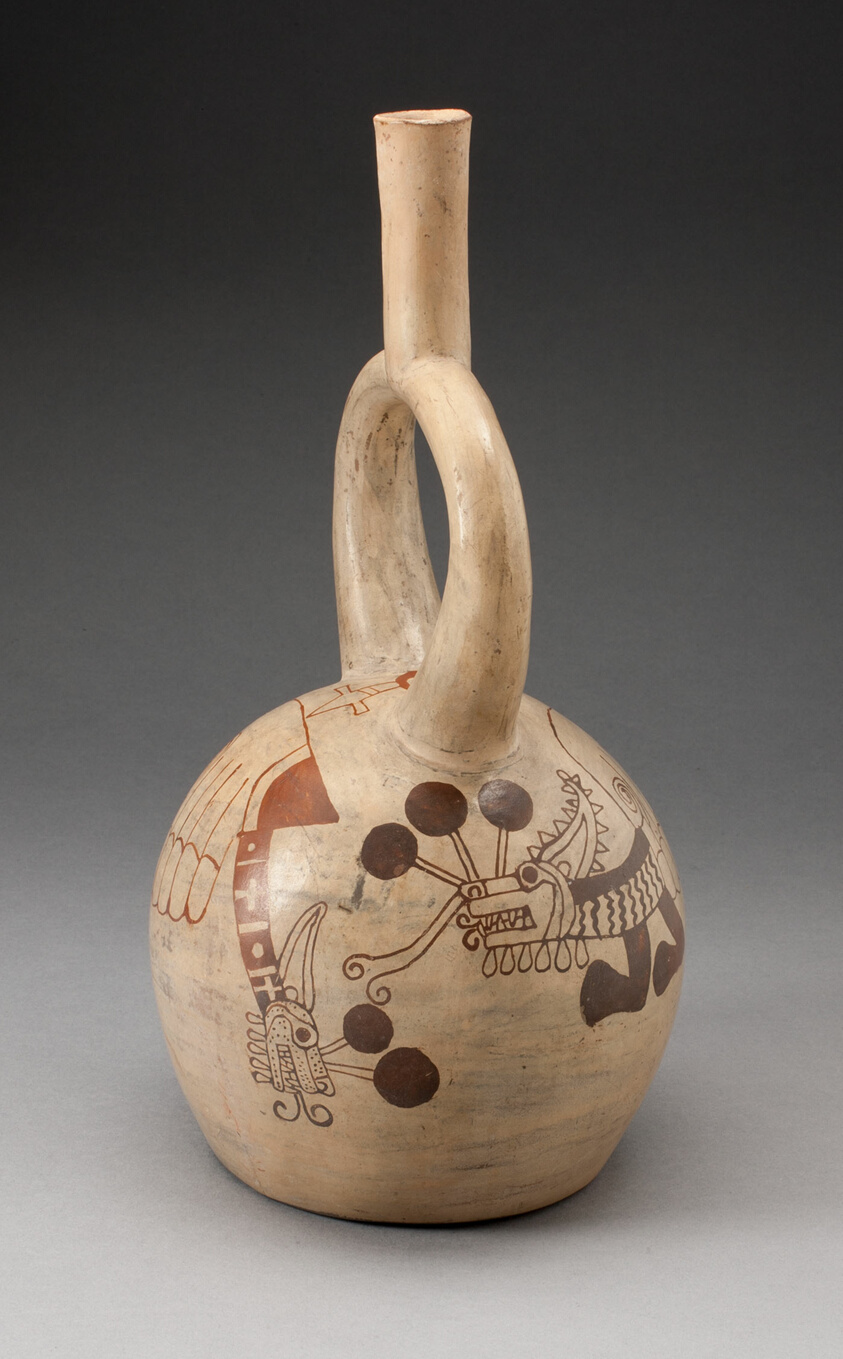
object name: Vessel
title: Stirrup Vessel Depicting a Supernatural Being within a Shell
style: moche, Arts of the Americas, andes, south american, andean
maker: Moche (North coast, Peru)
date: 100 BCE–500 CE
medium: Ceramic and pigment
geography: Peru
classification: earthenware; ceramics; vessel; art of the americas